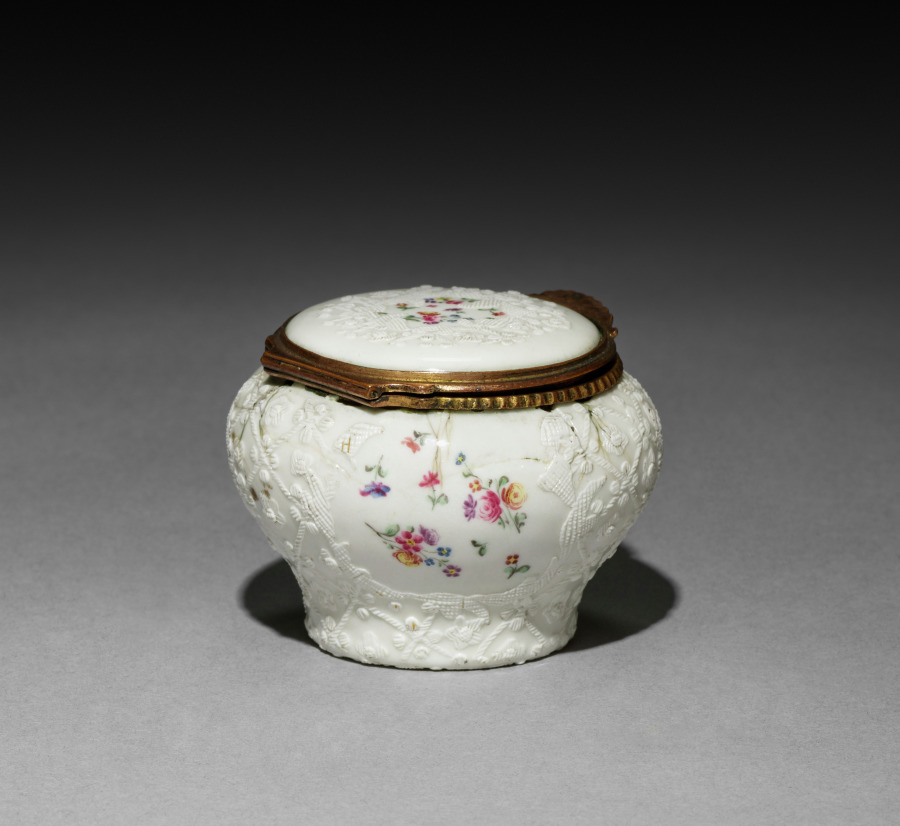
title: Box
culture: England, Staffordshire, 18th century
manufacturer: South Staffordshire Factory (British)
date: c. 1770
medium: enamel on copper with metal mounts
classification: Miscellaneous